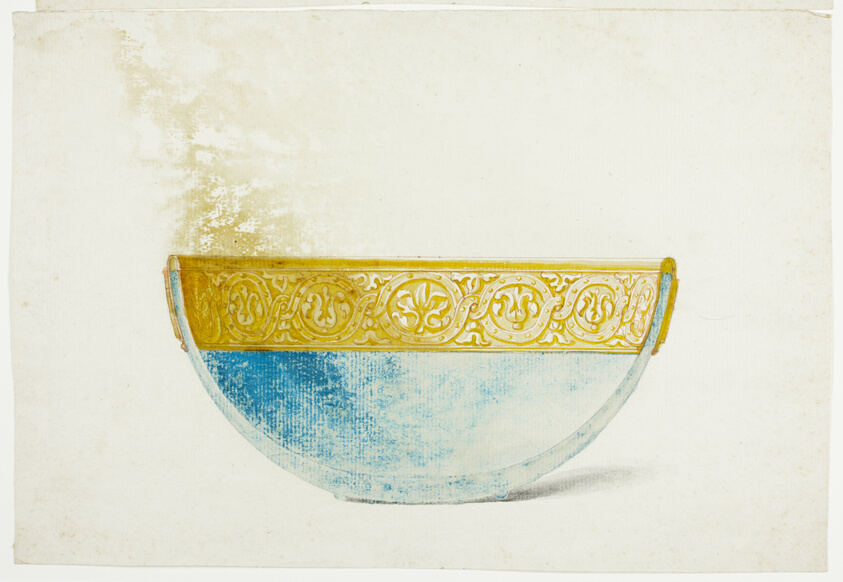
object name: Drawing and Watercolor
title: Decorative Bowl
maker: Giuseppe Grisoni (Italian, born Flanders, 1699-1769)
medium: Gouache, over traces of black chalk, on ivory laid paper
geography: Flanders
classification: gouache; watercolor; drawings (visual works); prints and drawing